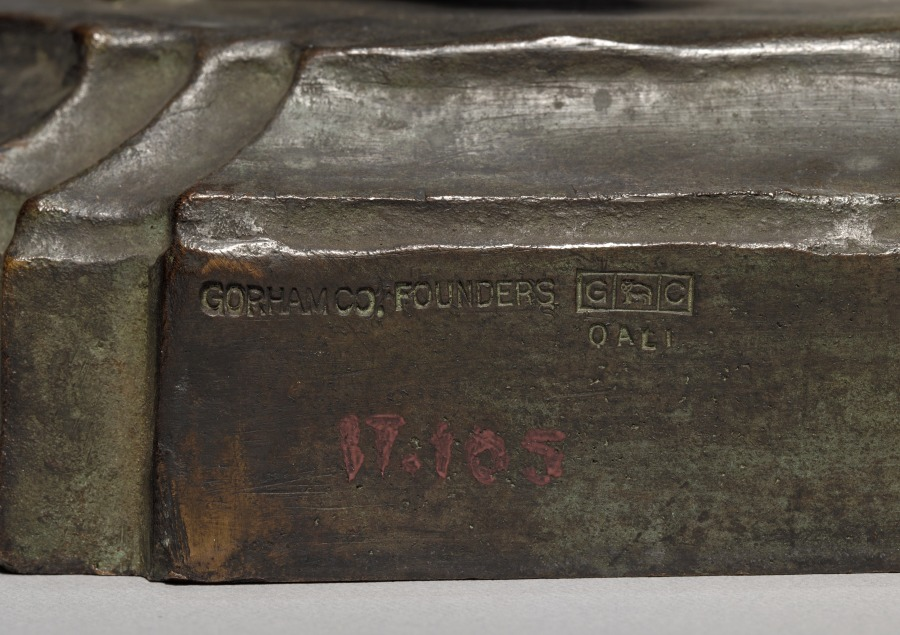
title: Pippa Passes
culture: America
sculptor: Louise Allen (American, 1880–1953)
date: c. 1916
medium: bronze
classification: Sculpture